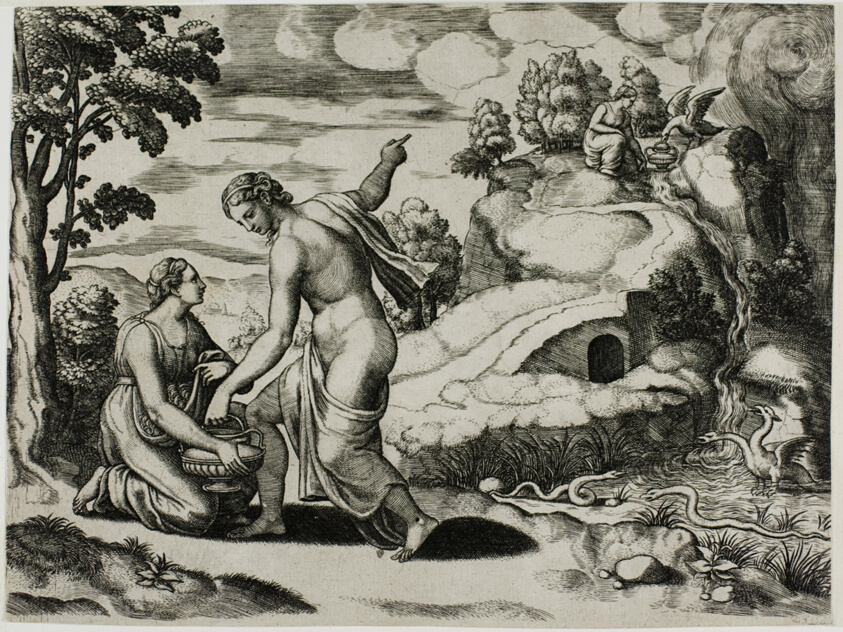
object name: Print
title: Venus Ordering Psyche to Seek Water From a Fountain Guarded by Dragons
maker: Master of the Die (Italian, active c. 1530-1560); after Michiel Coxcie I (Flemish, 1499-1592); in turn, inspired by Raffaello Sanzio, called Raphael (Italian, 1483-1520)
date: 1530/40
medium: Engraving in warm brown ink on ivory laid paper, attached to ivory laid paper along right margin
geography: Italy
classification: engraving; print; prints and drawing